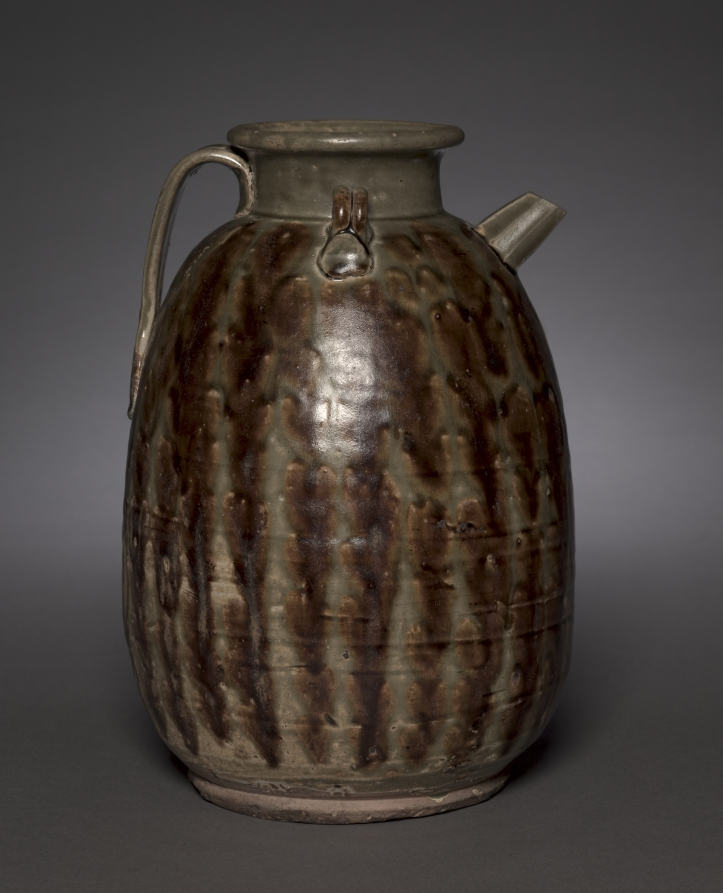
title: Ewer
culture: China, Hunan province, Tang dynasty (618-907)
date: 800s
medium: stoneware with olive-green glaze and ironbrown splashes, Changsha ware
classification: Ceramic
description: Used originally as a tea or wine ewer, this vessel has the strength of a Tang ceramic shape and the typical characteristics of Changsha ware, such as the stout proportions, the short, polygonal spout, and an overall color harmony and bold decoration. Its exterior is decorated with an olive-green glaze with iron-brown spots. The brown and the green glazes run into each other at certain areas during firing, creating a distinctive splashed-color effect. A more laborious treatment of the surface decoration makes this piece a rarity among surviving Changsha specimens. Changsha ware was a line of popular ware widely used and distributed within China. Specimens have been excavated not only in Hunan province, the area of production, but also in Shaanxi, Henan, Hebei, Hubei, Anhui, Jiangsu, Guangdong, and Guangxi provinces. As valuable export commodities of Tang dynasty China, Changsha wares have also been found at ancient sites in Japan, Korea, the Philippines, Thailand, Indonesia, Pakistan, Sri Lanka, Iran, Iraq, Arabic Peninsula, and Egypt.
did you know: This piece reveals the unexplored stylistic relationship between sancai (three-color) polychrome wares from northern kilns and Changsha wares from southern kilns.